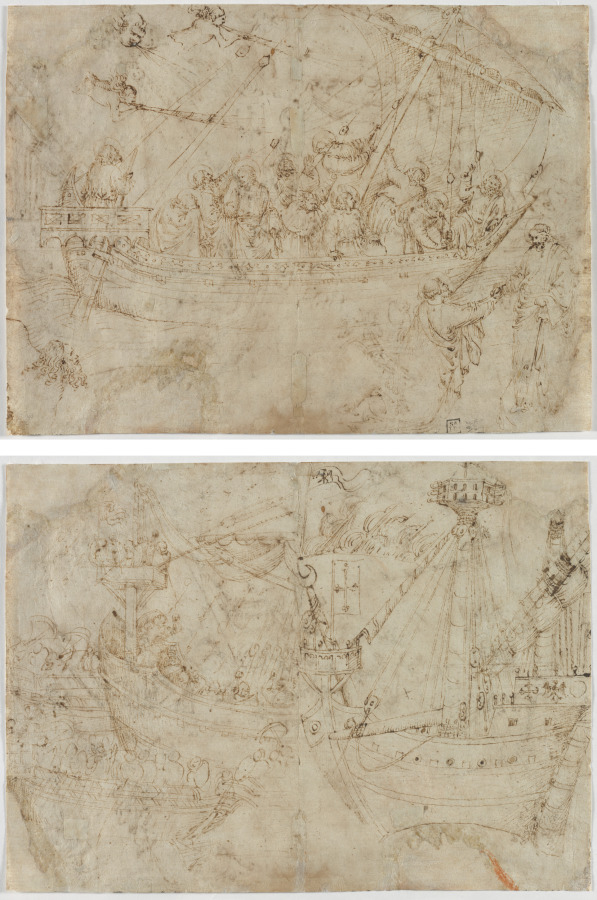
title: Navicella (recto); Two Drawings of Ships (verso)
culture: Italy, Arezzo, 15th century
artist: Parri Spinelli (Italian, 1387–c. 1453)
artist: after Giotto (Italian, 1266–1337)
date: c. 1410s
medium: pen and brown ink (iron gall)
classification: Drawing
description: Once attributed to the Italian painter Giotto (about 1267-1337), this drawing is the oldest sheet in the Cleveland museum's collection. We now know it to be a copy by Parri Spinelli after a mosaic Giotto designed for the portico of the church of Old St. Peter's in Rome.